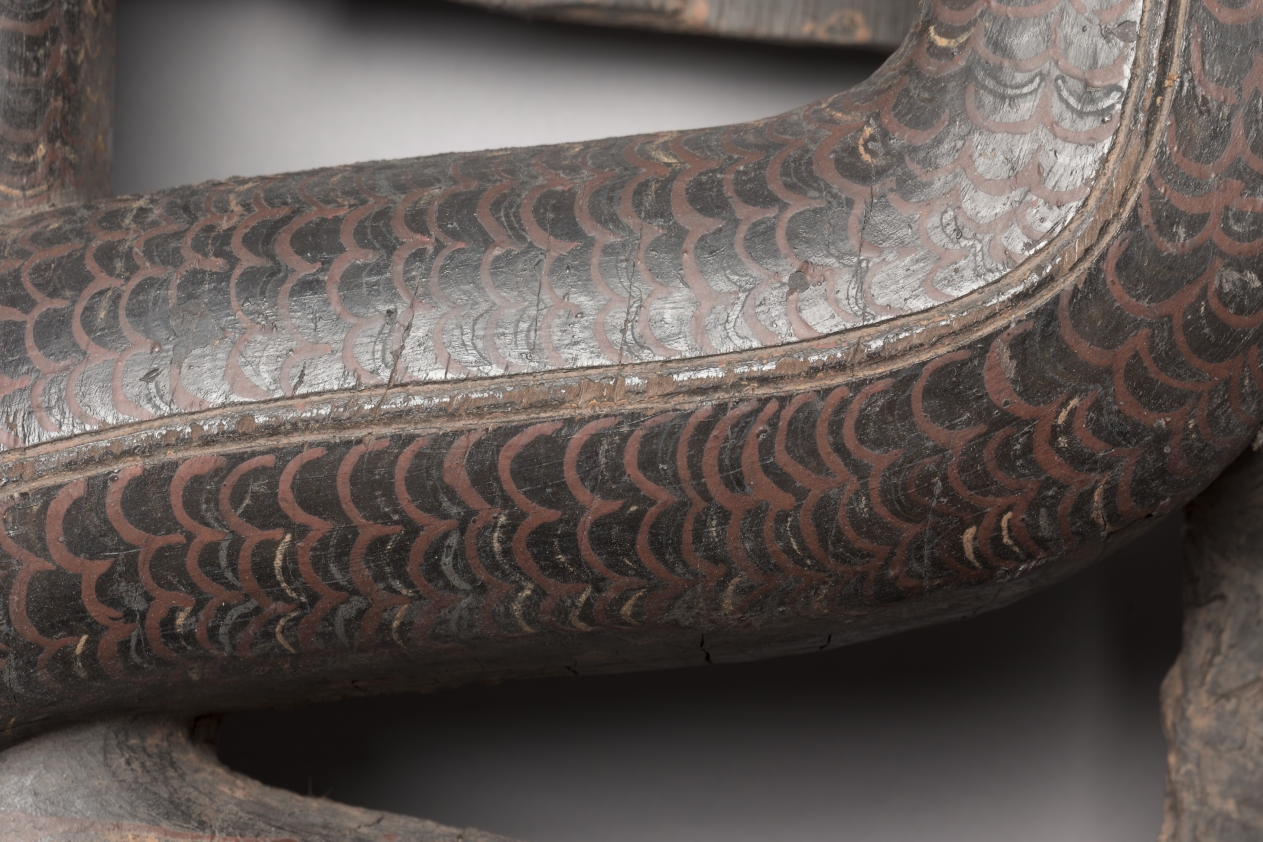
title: Cranes and Serpents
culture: China, reportedly from Hunan province, Changsha, Warring States period (475–221 BCE), State of Chu (c. 1046–223 BCE)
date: 475–221 BCE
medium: lacquered wood with polychromy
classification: Sculpture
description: A different style of ritual art developed in the state of Chu in South China. In addition to bronze vessels, lacquered wood artifacts expanded the repertory of ritual implements. This extraordinary sculpture was probably a drum stand for supporting a suspended drum in ritual ceremonies. It is unique among other excavated drum stands of the Chu, which typically show two birds standing on tigers. The theme of the bird stepping on the serpent was common in the Chu visual culture. Yet the slender proportions and seemingly flimsy structure of this particular set raise the question of whether it was utilitarian or mostly served symbolic functions in the tomb. The birds' and serpents' bodies have designs painted in red lacquer and yellow pigment against the black lacquer. Scientific analyses confirm the additional use of a blue or green pigment that has been discolored over time.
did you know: The cranes' long necks allowed a lightweight drum to be suspended from strings through the beaks, while the densely intertwined snakes provided a weighty base to stabilize the object during musical performances.